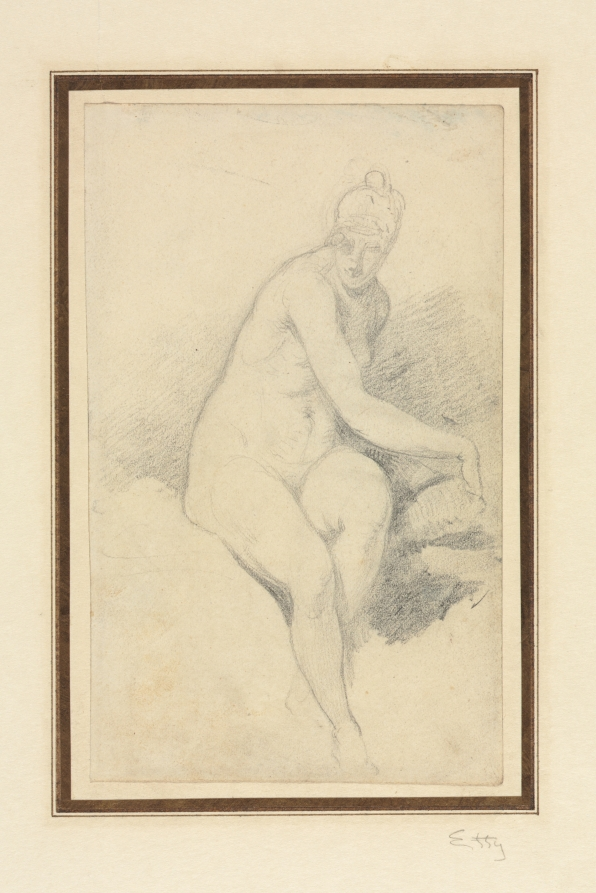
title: Seated Nude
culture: England, 19th century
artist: William Etty (British, 1787–1849)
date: c. 1807–49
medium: graphite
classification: Drawing